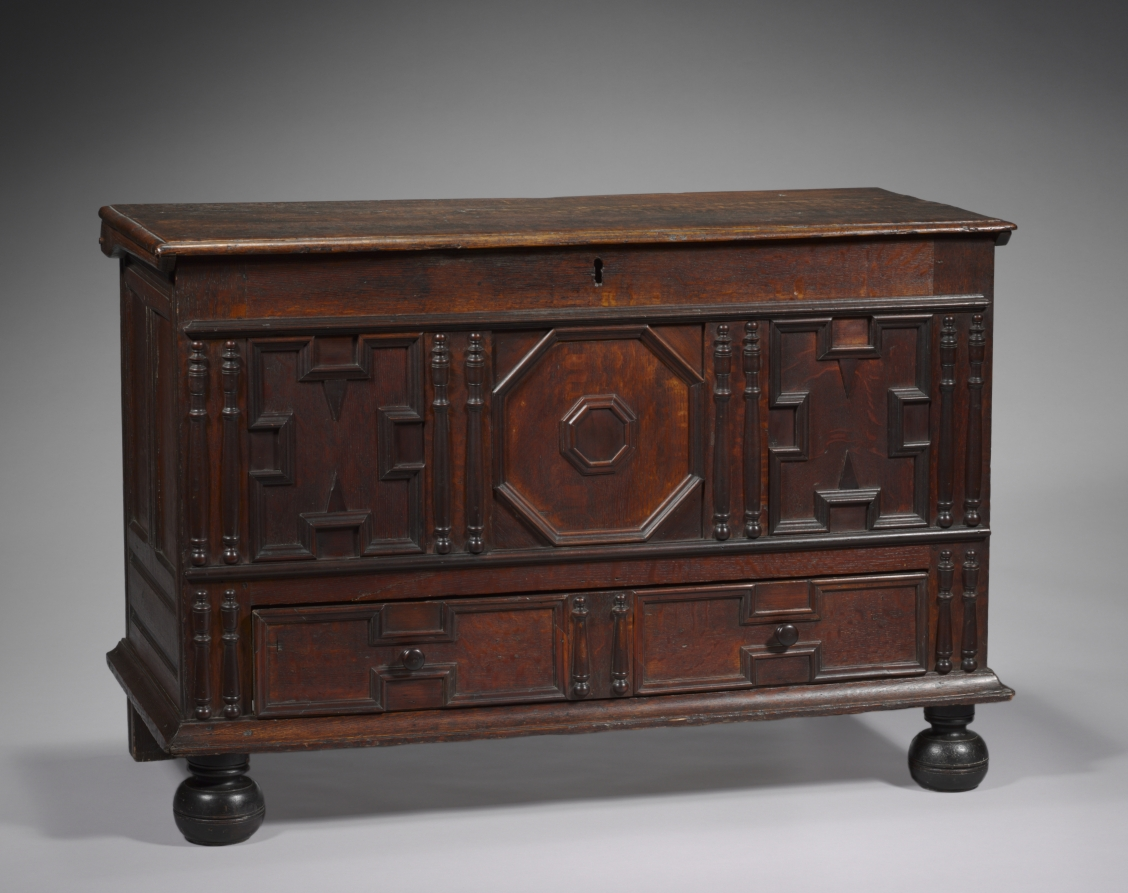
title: Chest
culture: America, Massachusetts, perhaps Salem, 18th century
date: c. 1700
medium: oak and pine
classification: Furniture and woodwork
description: This lift-top chest, with its decorative panels defined by moldings, may be associated with furniture made by John Symonds and his sons of Salem, Massachusetts. The thin, "split spindle" decorations are made by gluing two separate pieces of wood together and then splitting them after turning (shaping on a lathe).